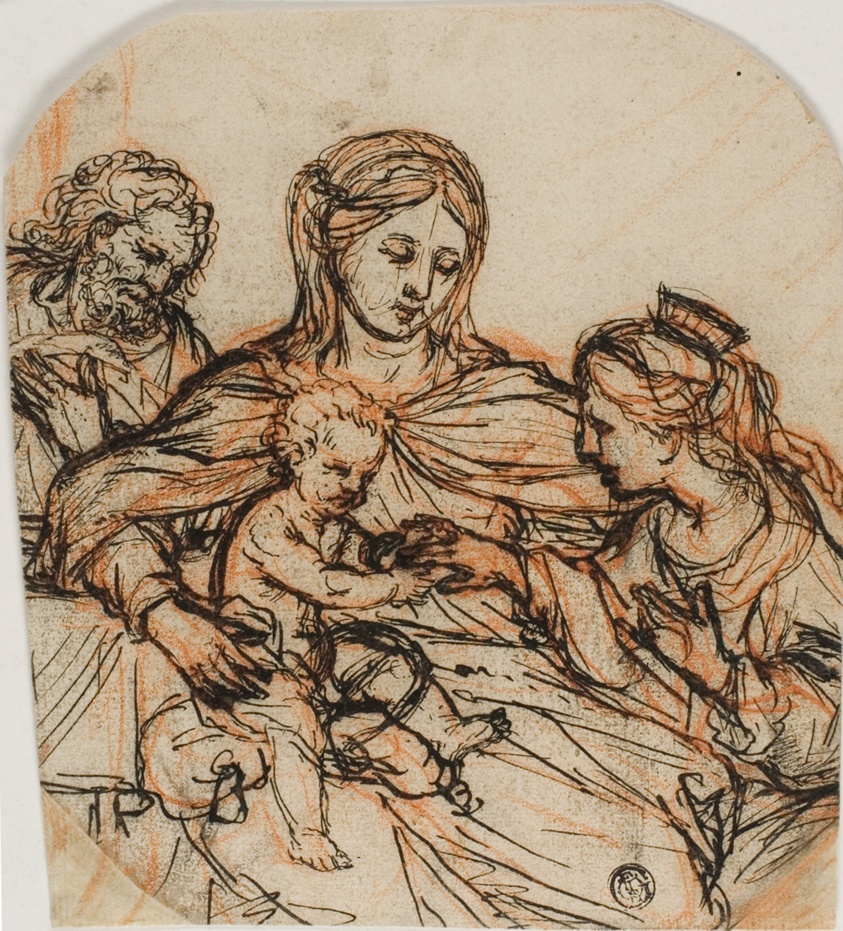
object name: Drawing and Watercolor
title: Mystic Marriage of Saint Catherine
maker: After Guercino; Italian, 1591-1666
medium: Pen and black ink, over red chalk, on cream laid paper, laid down on ivory laid paper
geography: Italy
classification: pen and ink drawings; drawings (visual works); prints and drawing